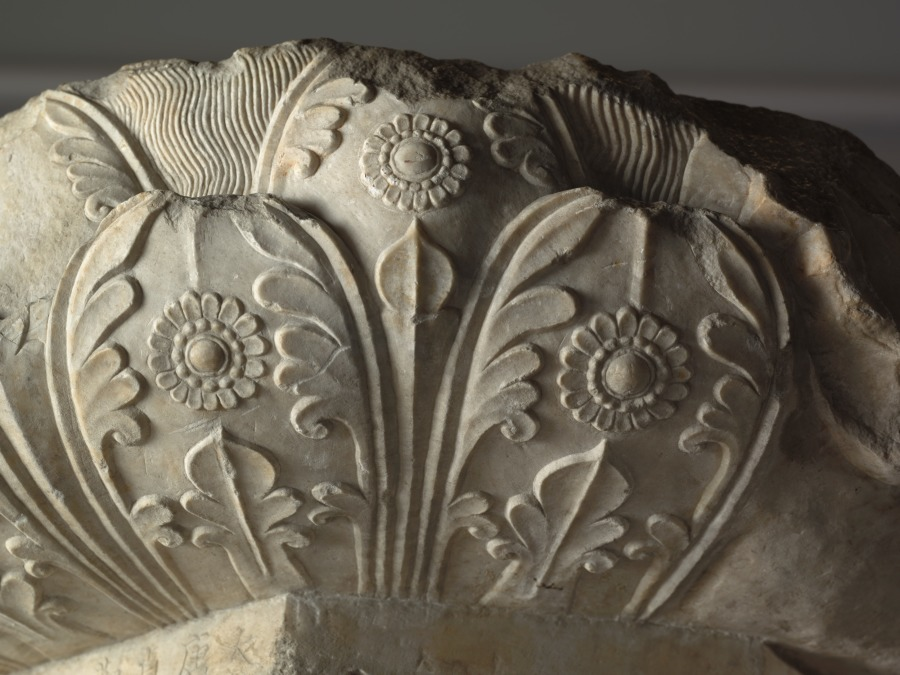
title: Fang Xuanling Pedestal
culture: China, Tang dynasty (618-907)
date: 647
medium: marble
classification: Sculpture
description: This double lotus pedestal exhibits the rich, ornate style of early Tang sculpture. It was commissioned by the Duke of Liang, Fang Xuanling (578–648), for the blessing of his second son and daughter-in-law, the Tang imperial princess of Gaoyang. The iconography and inscription suggest that it originally went with a statue, now missing, of Shakyamuni, the historical Buddha, instead of Amitayus. Today the pedestal is topped with Amitayus, the Buddha of Infinite Life, seated in meditation. Although the pedestal was not made with the statue, the combination is faithful to the original artistic conception.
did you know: In front, the top layer of the pedestal has an abstract curvilinear motif suggesting drapery; the rear is carved with a flower-and-leaf motif.